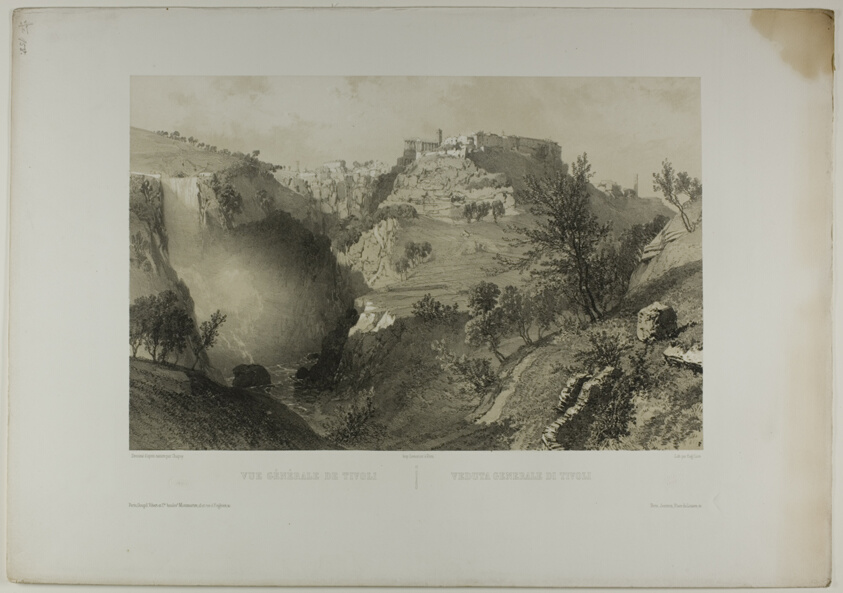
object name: Print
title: General View of Tivoli, plate seventeen from Italie Monumentale et Pittoresque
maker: Eugène Cicéri (French, 1813-1890); after Nicolas Chapuy (French, 1790-1858)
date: c. 1848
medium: Lithograph from two stones on white wove paper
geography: France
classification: lithograph; print; prints and drawing